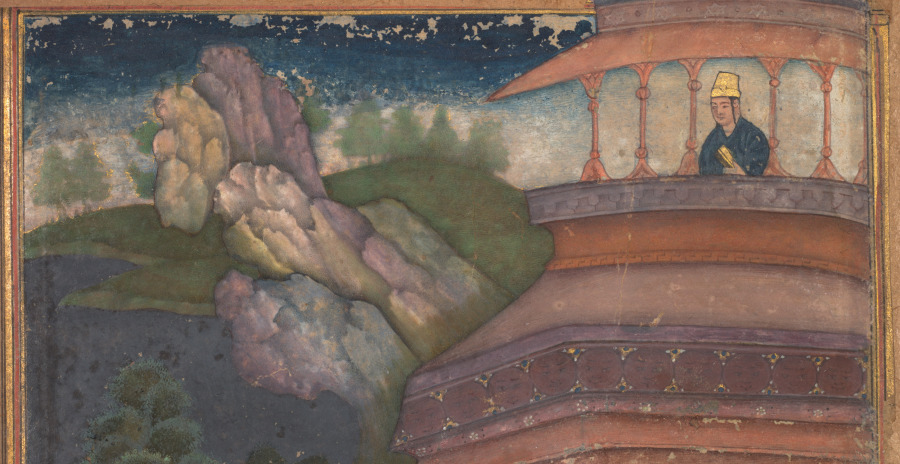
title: Mary ascends the stairs to the temple, from a Mirror of Holiness (Mir’at al-quds) of Father Jerome Xavier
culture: Mughal India, Allahabad, made for Prince Salim (1569–1627)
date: 1602–4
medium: Gum tempera, ink, color, and gold on paper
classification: Manuscript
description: Three-year-old Mary bounds up the stairs of the temple, eager to begin her education. Onlookers gesture in surprise. In the background the rocks have been cleverly shaded to look like faces—a Persian technique of visual double-entendre that the Mughals admired and adopted. This work is the second of the 27 surviving paintings made for this manuscript. The first, a scene of Mary’s birth, is in a private collection in Europe. Mary’s face had been painted with a fragile white paint, which has fallen off. Now only the underdrawing remains visible.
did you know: Mary’s instructor awaits her, book in hand, at the top of a temple of learning.